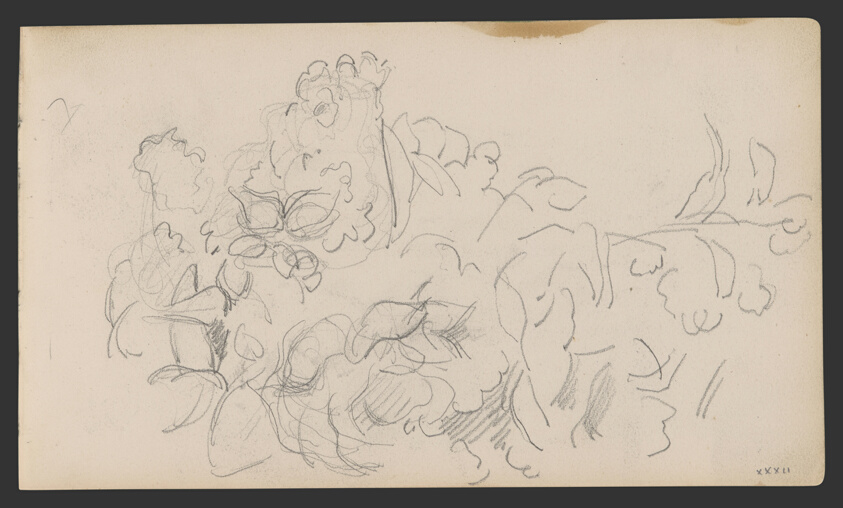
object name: Drawing and Watercolor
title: Sketchbook No. 2 (L'Estaque)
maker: Paul Cézanne; French, 1839-1906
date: 1875–86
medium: Graphite and pen and ink drawings on paper, bound into a book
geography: France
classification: sketchbook; graphite; prints and drawing; paper